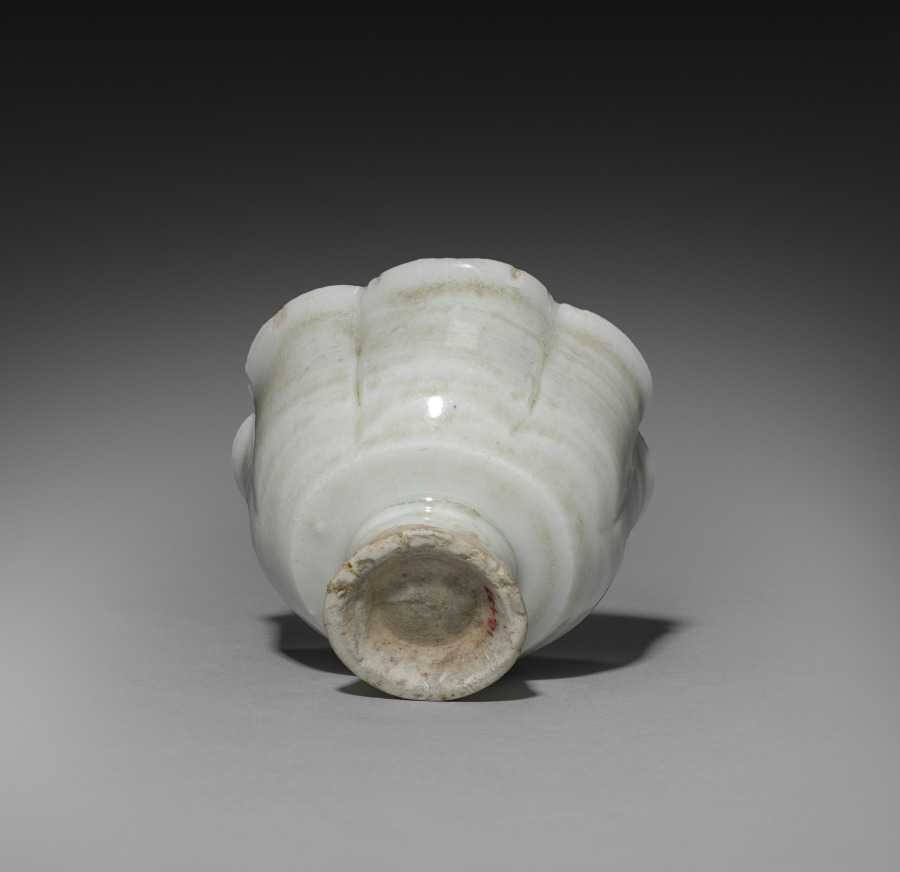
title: Cup and Stand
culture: Korea, Goryeo dynasty (918–1392)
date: 918–1392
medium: pottery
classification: Ceramic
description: As early as the seventh century, the practice of drinking tea and wine became an important part of elite culture in Korea. Elites of the Goryeo period commissioned a variety of types of utensils and vessels including this delicate-looking cup and cup stand, not only to make their drinking experience more exciting, but also to show their refined taste.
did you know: Elites of the Goryeo period are known for their love of drinking tea and wine. Many sophisticated tea wares such as this example were buried in the tombs of ruling elites.